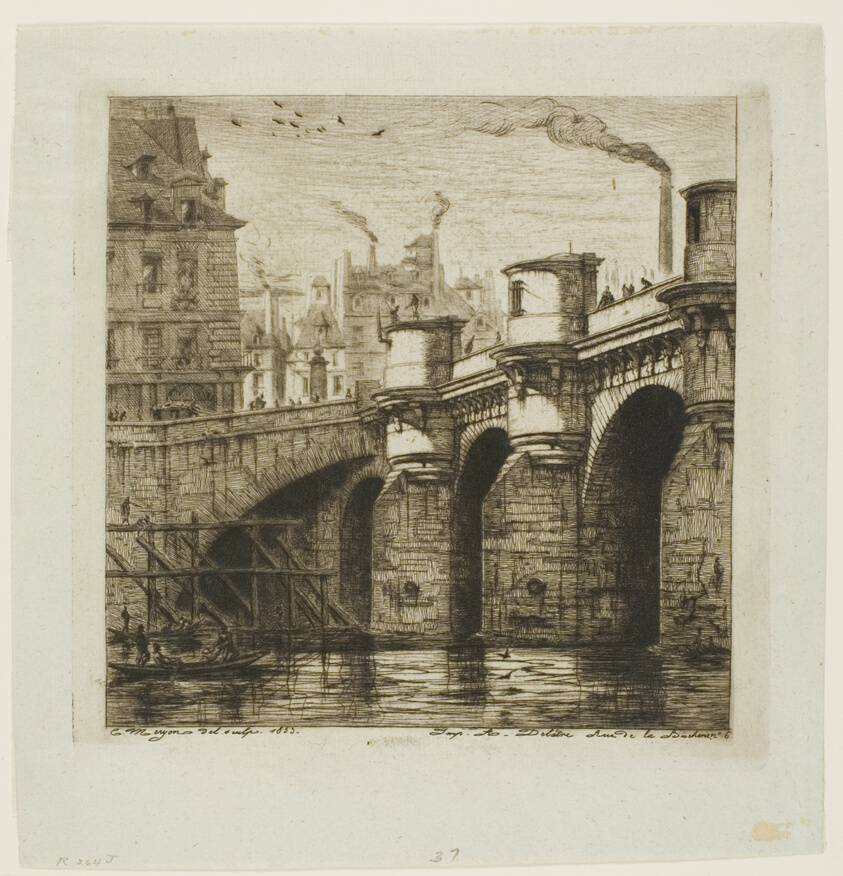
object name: Print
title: Pont-Neuf, Paris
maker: Charles Meryon (French, 1821-1868); printed by Auguste Delâtre (French, 1822-1907)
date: 1853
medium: Etching and drypoint in warm black on verdâtre (greenish) laid paper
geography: France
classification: etching; print; prints and drawing